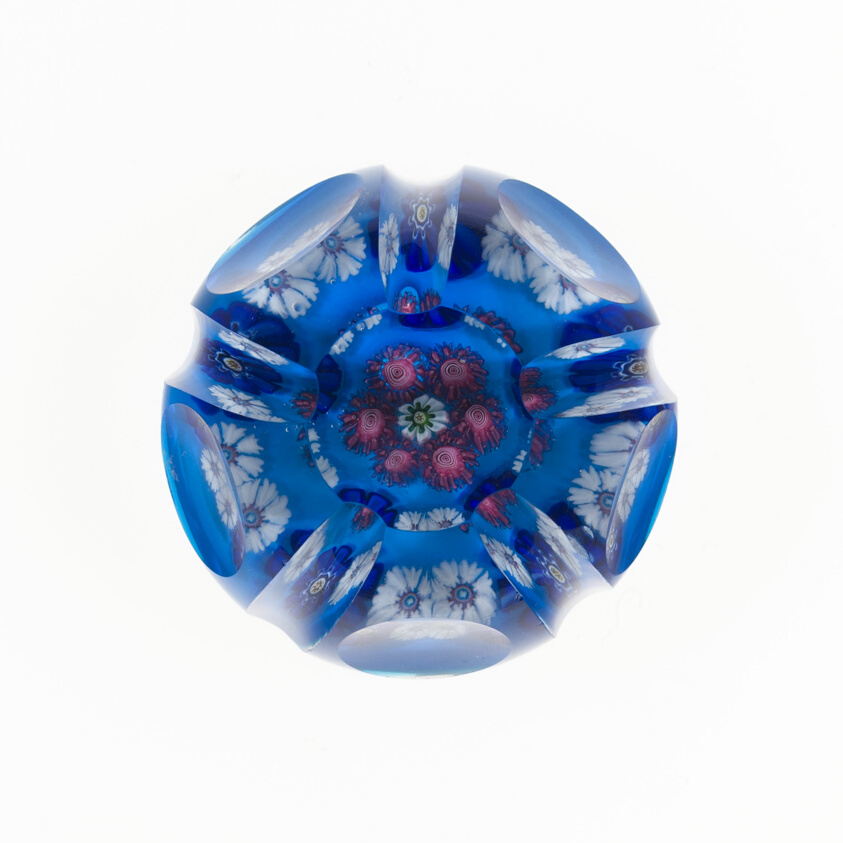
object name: Glass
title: Paperweight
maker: Clichy Glassworks (Cristalleries de Clichy); Clichy, France, 1837-1885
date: c. 1845/60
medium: Glass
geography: France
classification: paperweight; glass